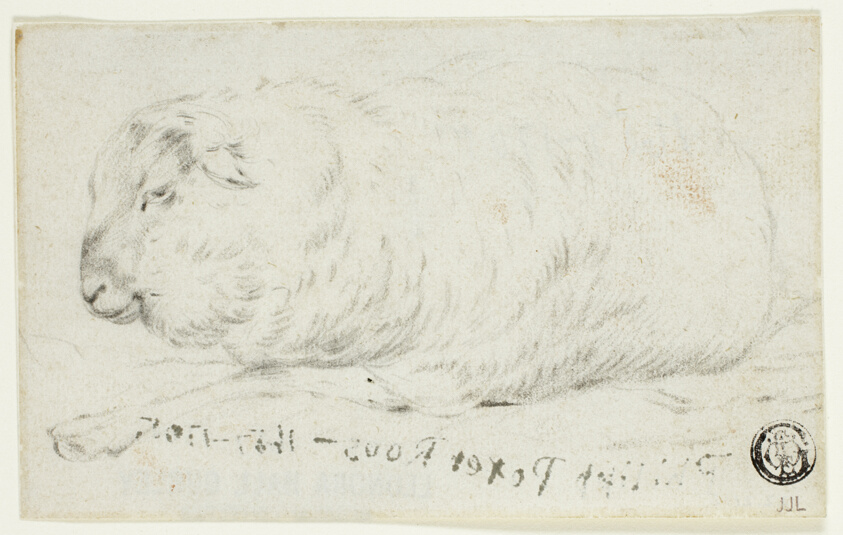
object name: Drawing and Watercolor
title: Sheep Lying Down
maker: Johann Heinrich Roos (German, 1631-1685)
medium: Black chalk on ivory laid paper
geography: Germany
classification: chalk; drawings (visual works); prints and drawing